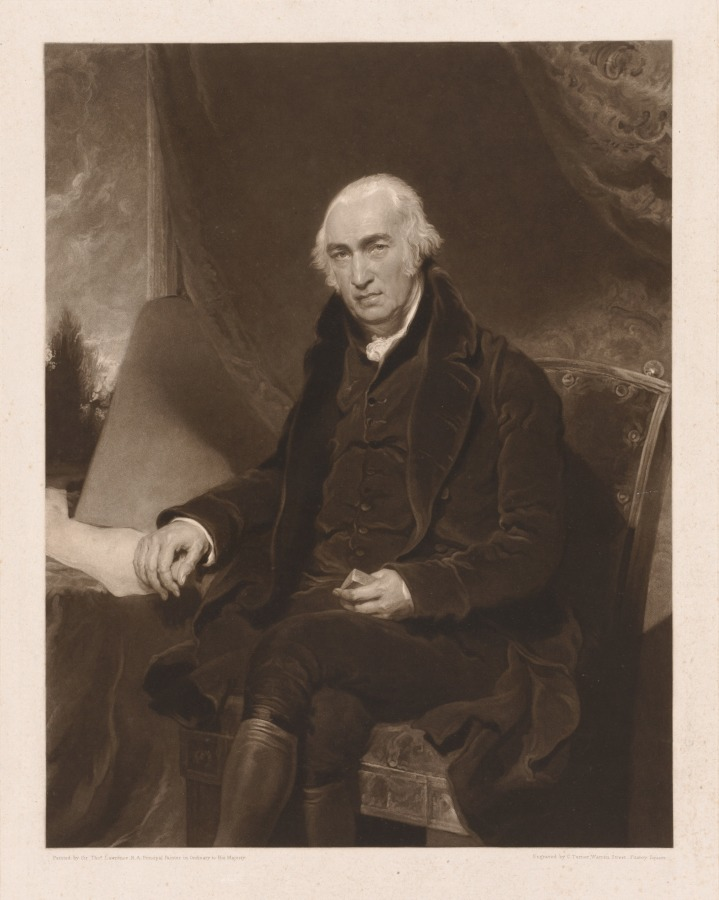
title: James Watt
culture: England, 19th century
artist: Charles Turner (British, 1774–1857)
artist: after Thomas Lawrence (British, 1769–1830)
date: 1815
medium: mezzotint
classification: Print